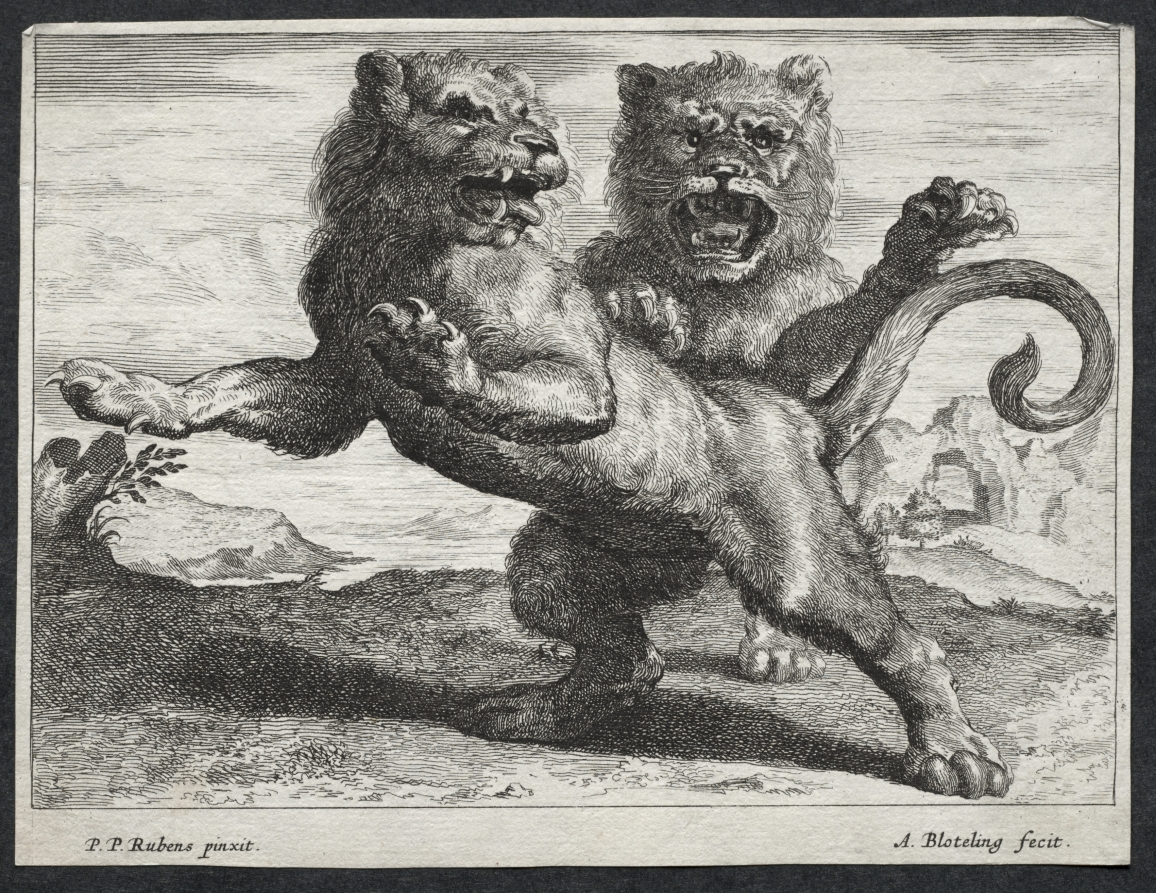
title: Various Lions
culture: Netherlands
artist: Abraham Blooteling (Dutch, 1640–1690)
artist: after Peter Paul Rubens (Flemish, 1577–1640)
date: 1655–90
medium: etching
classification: Print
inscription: Verso: indecipherable collector's stamp (faded due to cleaning)